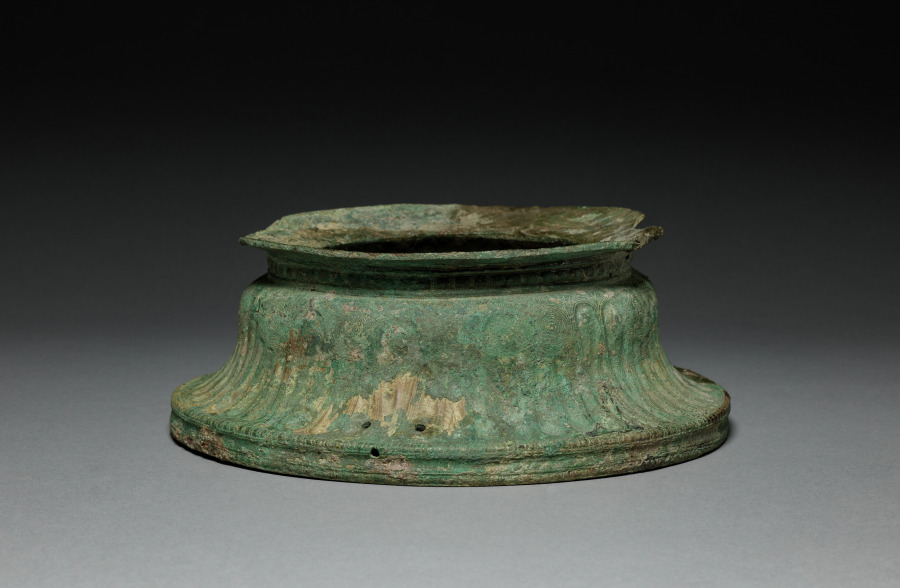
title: Bronze Volute Krater Base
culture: Greece, Laconia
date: late 600s BCE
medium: bronze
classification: Metalwork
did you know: This object supported a large vessel used for mixing wine with water called a krater.